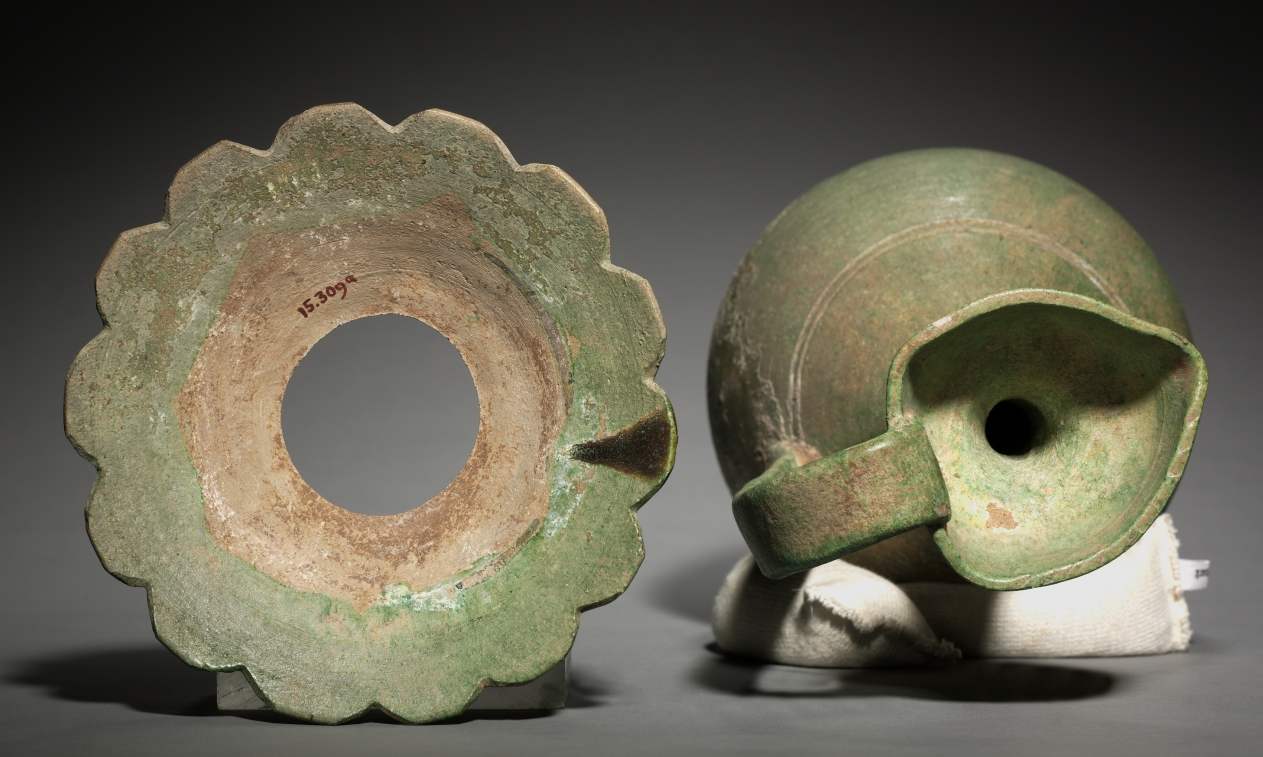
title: Ewer with Corolla Base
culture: China, Manchuria, Liao dynasty (916-1125)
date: 907–1125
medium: pottery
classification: Ceramic